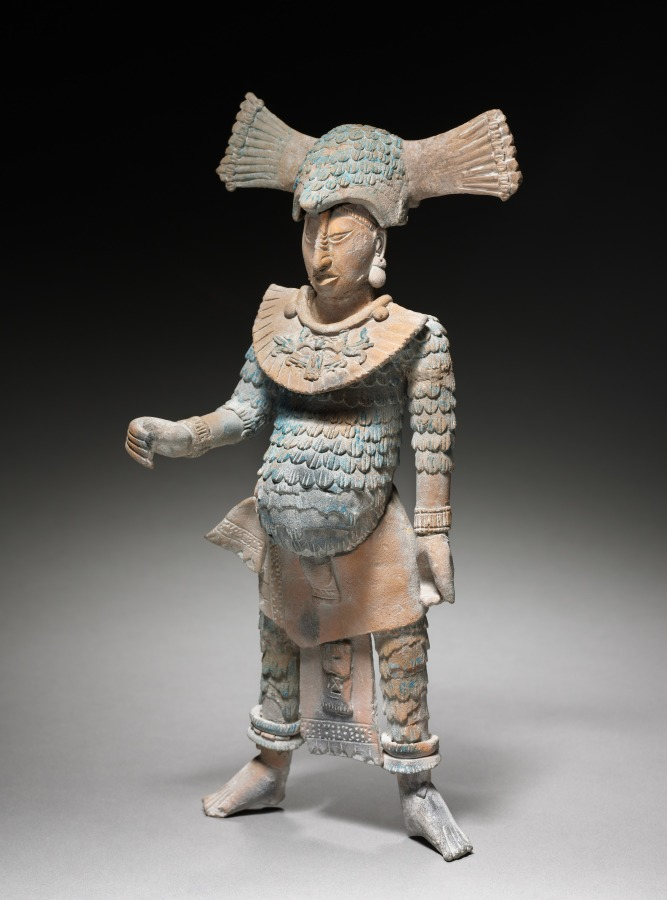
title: Warrior Figurine with Removable Headdress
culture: Mexico, Yucatán, Jaina Island region, Campeche, Maya style (250-900)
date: 600–900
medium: earthenware with pigment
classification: Sculpture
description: The major offerings placed in the Maya graves of Jaina Island were ceramic figurines, some of Mesoamerica's finest, that depict deities and humans in a variety of roles. This warrior, his headdress removable, once probably held weapons and wears either quilted cotton armor or the feathered uniform of a military order. We don't know why such figures are often pot-bellied.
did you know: Maya blue pigment was made by combining clay with indigo in a complex technique developed around the ninth century.